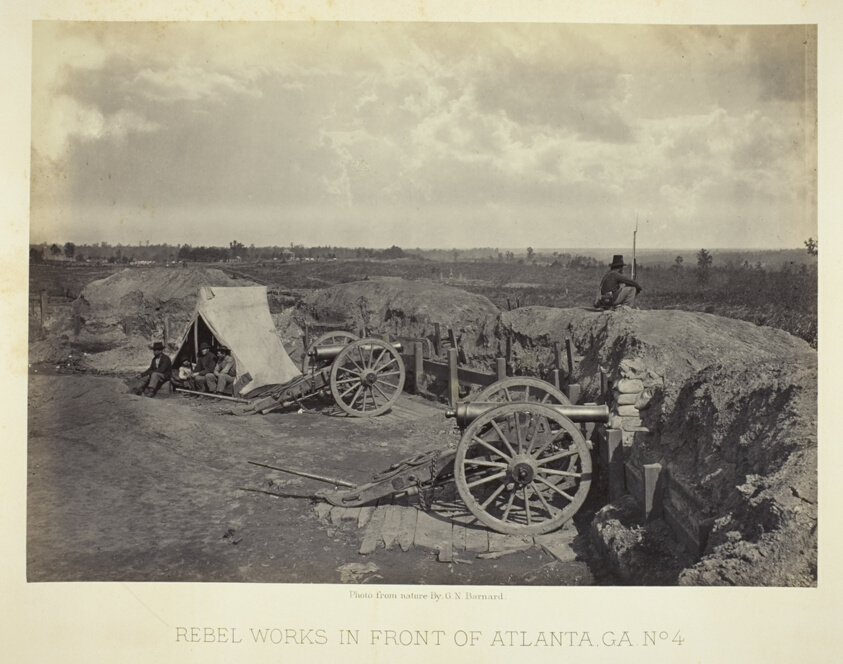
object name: Photograph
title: Rebel Works in Front of Atlanta, GA, No. 4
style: 19th century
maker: George N. Barnard (American, 1819–1902)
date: 1864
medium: Albumen print, plate 42 from the album "Photographic Views of the Sherman Campaign" (1866)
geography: United States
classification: albumen silver print; photographic process; photography; photograph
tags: Collected by Hugh Edwards, Sherman's Campaign 1866